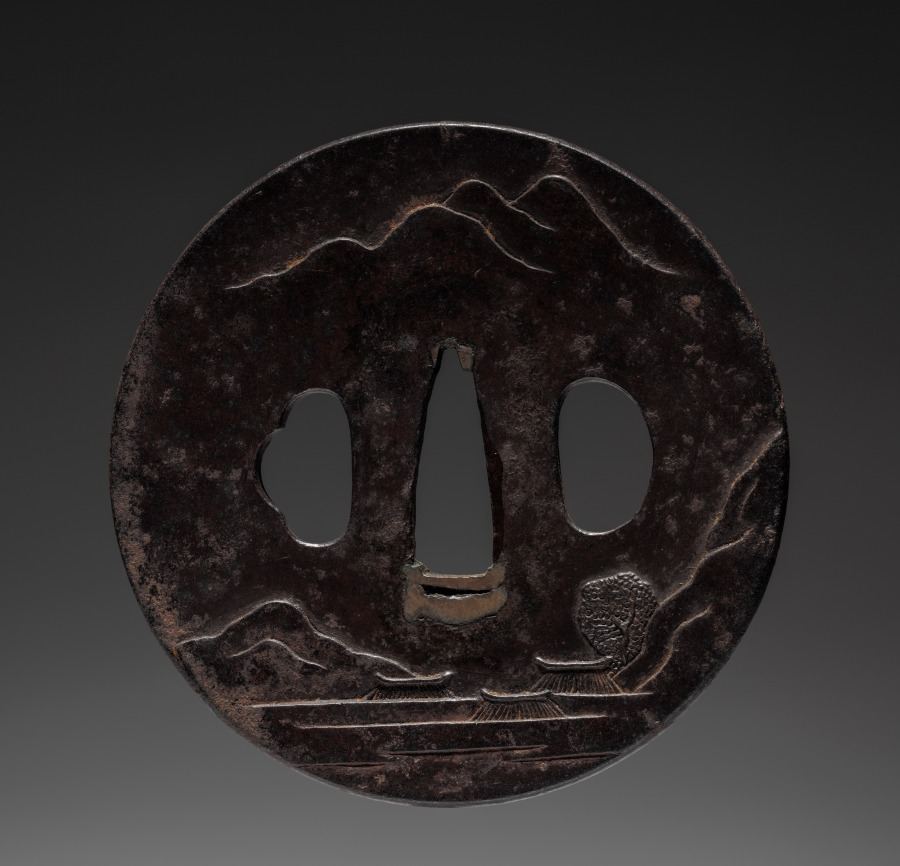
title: Sword Guard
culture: Japan, Edo period (1615–1868)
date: mid-1700s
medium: iron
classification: Arms and Armor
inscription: Signature: Tomohisa, residing at Hagi, Nagato province made